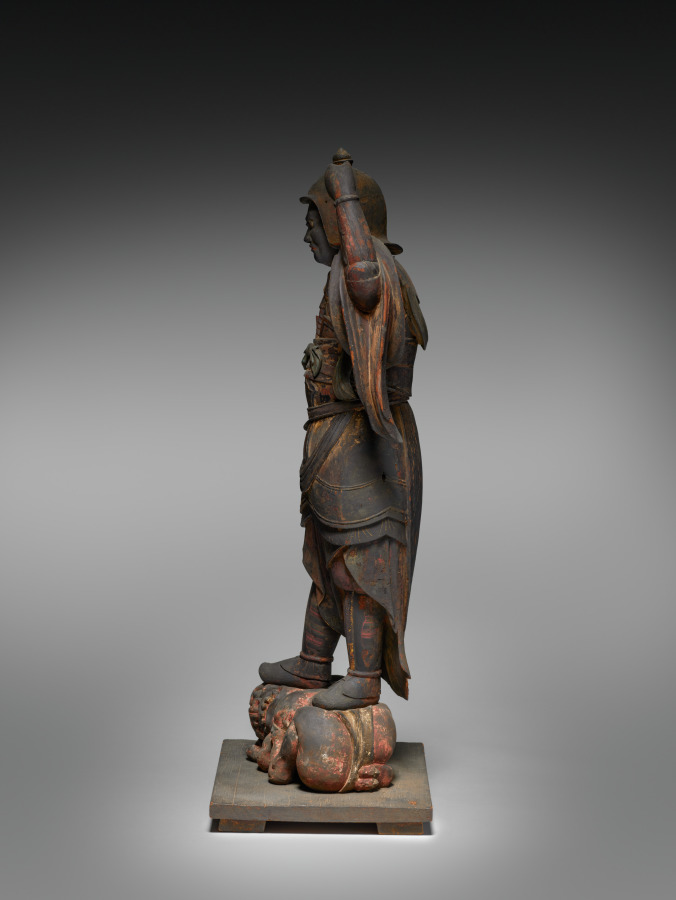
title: Guardian Figure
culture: Japan, Heian period (794–1185)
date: 1000s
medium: wood with polychromy and kirikane (cut-gold)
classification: Sculpture